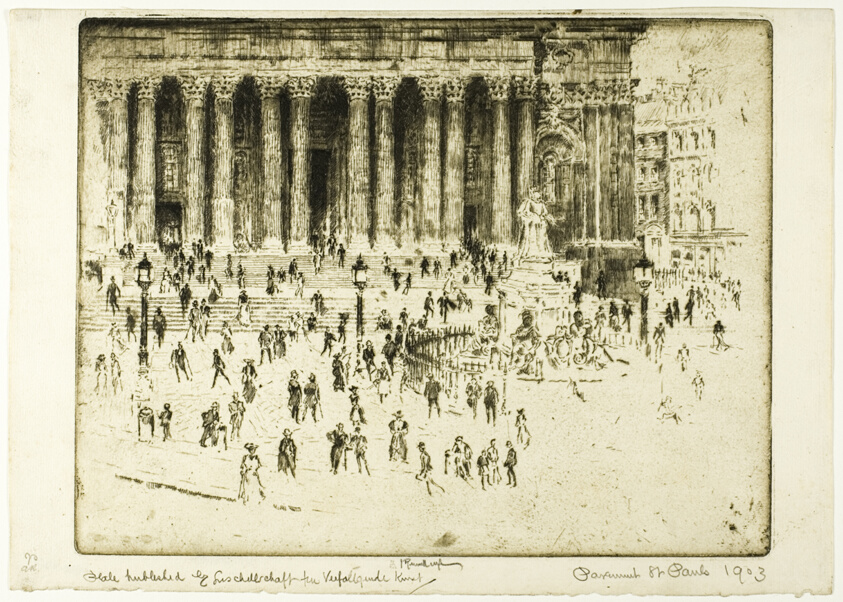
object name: Print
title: Saint Paul's Pavement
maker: Joseph Pennell (American, 1857-1926)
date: 1905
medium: Etching on ivory laid paper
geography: United States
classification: etching; print; prints and drawing